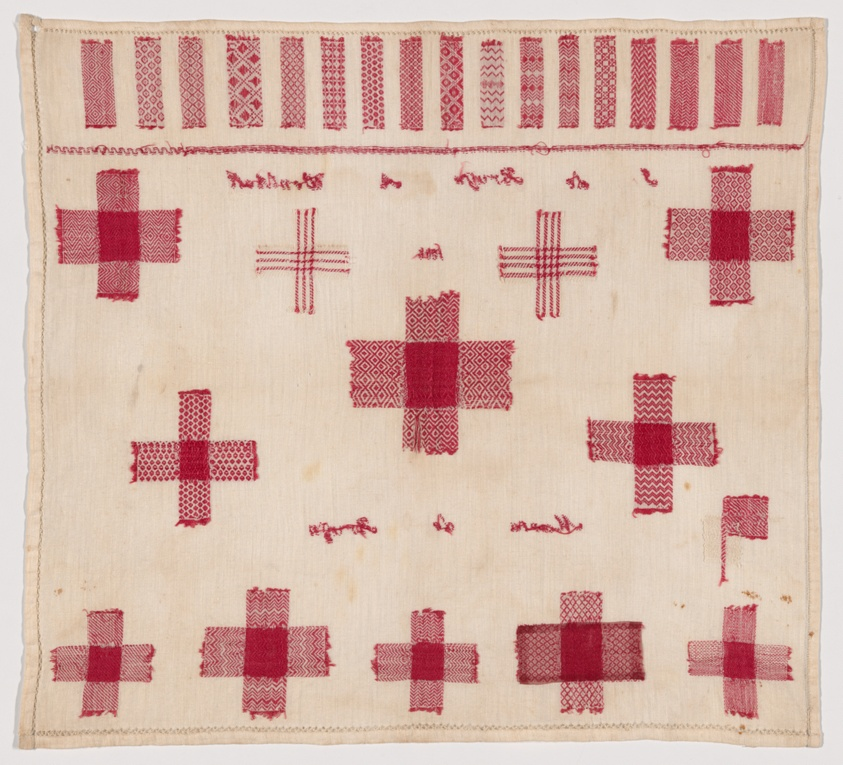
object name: Textile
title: Darning Sampler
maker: Netherlands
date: 1808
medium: Cotton, plain weave; embroidered in darning and cross stitches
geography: Netherlands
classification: textile; needlework (visual works); sampler